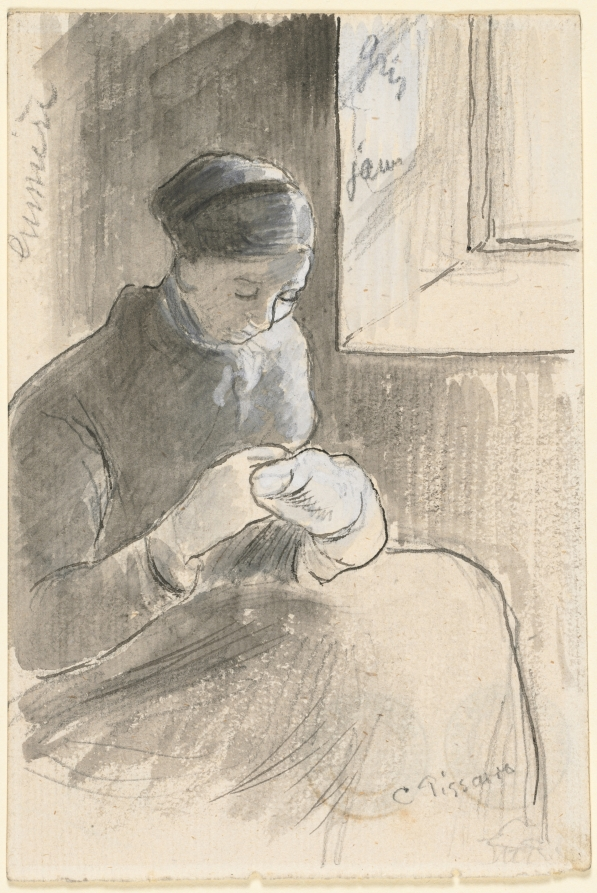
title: The Mender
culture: France, 19th century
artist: Camille Pissarro (French, 1830–1903)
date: c. 1881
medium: pen and black ink and gray wash over graphite heightened with white gouache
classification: Drawing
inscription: signed, lower right, in graphite: C Pissarro; by artist, upper left, in graphite: lumière; by artist, upper right, in graphite: gris; by artist, upper right, in graphite: jaun; VERSO, by artist?, upper right, in graphite: CP81 / a - [illegible][crossed out]; lower left, in graphite: 21952; lower right, in graphite: Nº 13 [underlined]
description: Camille Pissarro used the French countryside and its inhabitants as the subject of his art throughout his career. He frequently depicted women sewing, often outdoors or seated beside a window, as seen in this drawing. He indicated the effects of natural light illuminating his subject with the notation "lumière" at the left margin of the drawing.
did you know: At the time this drawing was made, Camille Pissarro lived in the small village of Pontoise. He remained there for over a decade to immerse himself in the type of rural life that he depicted in his art.